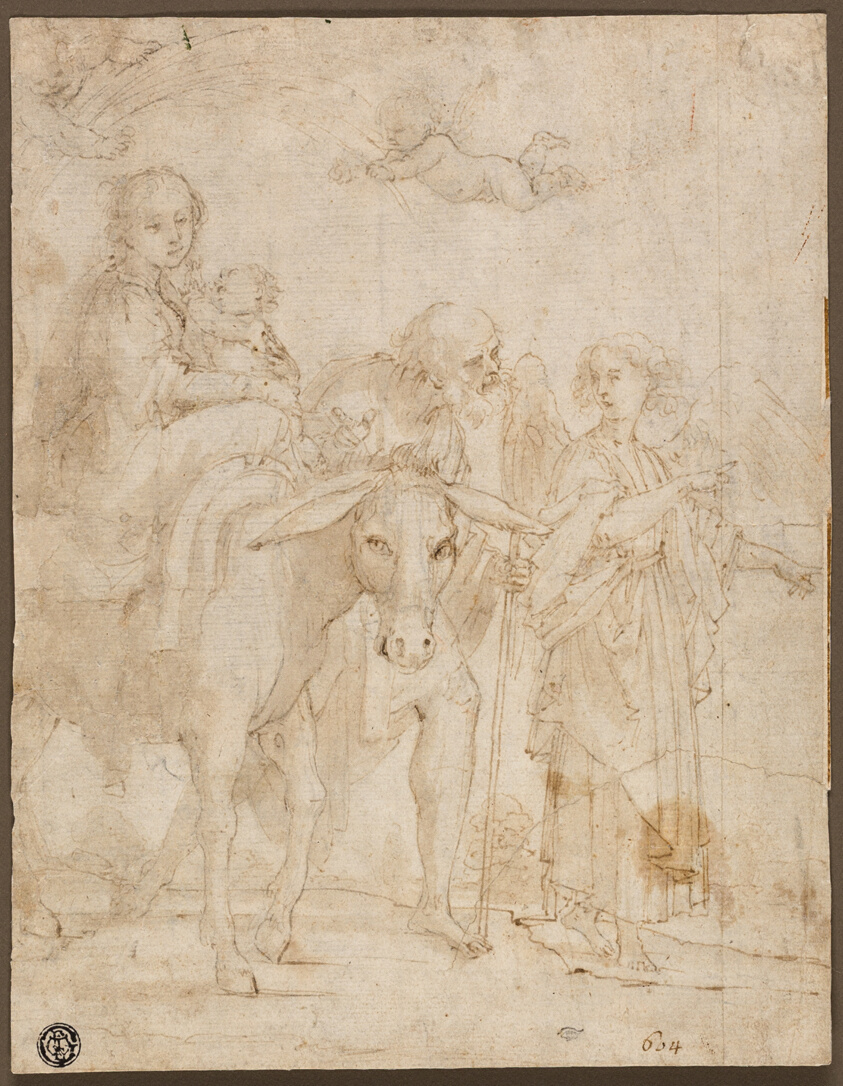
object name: Drawing and Watercolor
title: Flight into Egypt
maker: Attributed to Giovanni Baglione; Italian, 1573-c. 1644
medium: Pen and brown ink, with brush and brown wash, over traces of black chalk, on cream laid paper, laid down on ivory laid paper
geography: Italy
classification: pen and ink drawings; drawings (visual works); prints and drawing